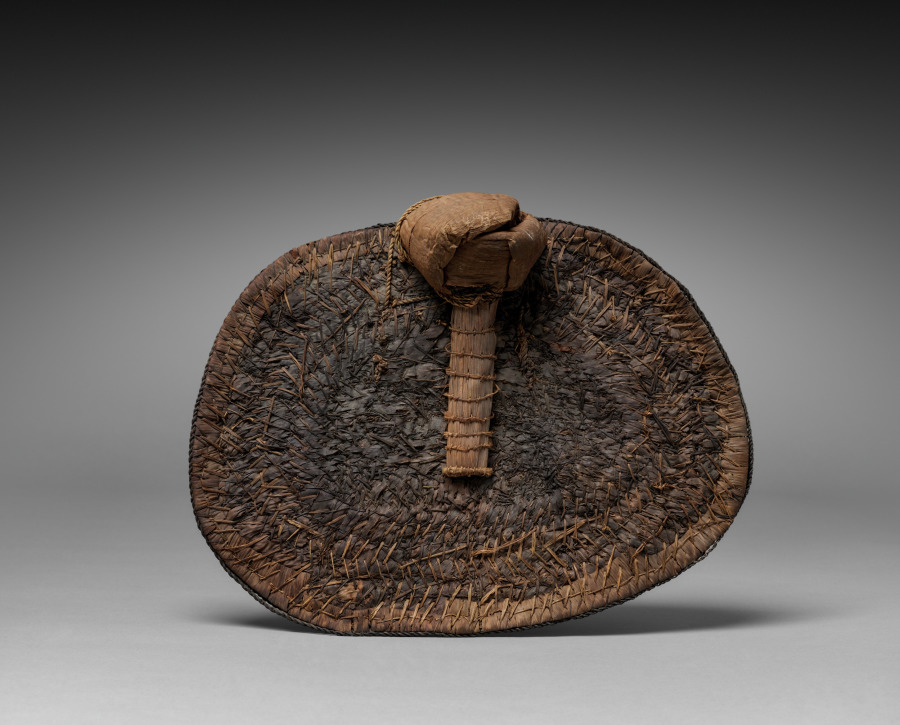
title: Back Skirt / Sitting Pad (negbe)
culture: Africa, Central Africa, Democratic Republic of the Congo, Mangbetu-style maker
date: before 1929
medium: Plant fibers and dye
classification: Garment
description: Egbe (singular: negbe) were fashionable and practical garments aristocratic Mangbetu women made for special occasions. Worn over a skirt, it tied onto a girdle along with a frontal “apron.” The curved interior piece rested on the lower back. Thickly woven, flexible natural fibers bent with the body, cushioning the wearer’s behind when sitting. When the woman was standing, the decorated flat portion faced outward, showing off bold geometric motifs. Egbe were among items sold to foreigners at the Mangbetu king’s encouragement as the Mangbetu actively constructed their self-image for outsiders during the 1920s and 1930s.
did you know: A contemporary fashion in 1929, when it was purchased or collected, this negbe is now a historical document of past styles.